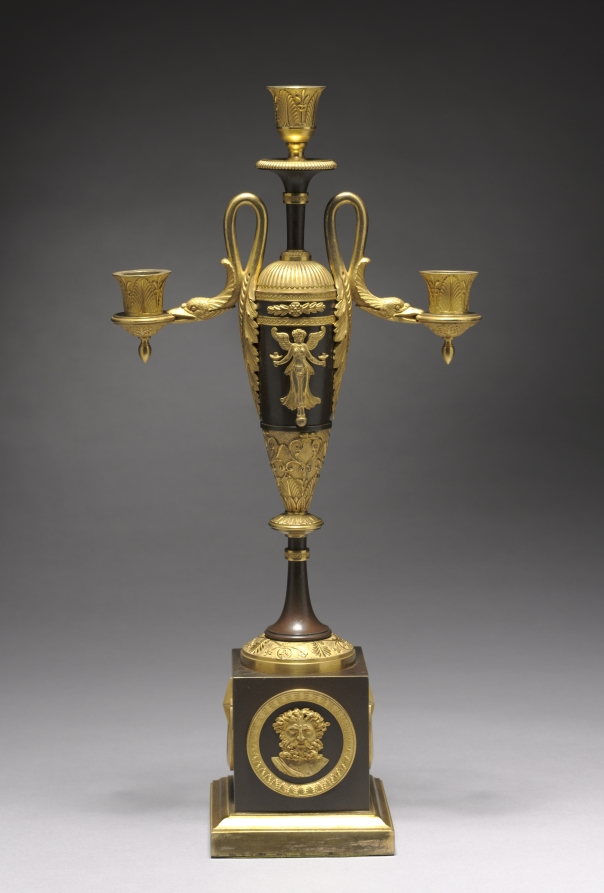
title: Candelabrum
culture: France, late 18th-early 19th century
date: c. 1800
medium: gilt and patinated metal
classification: Furniture and woodwork